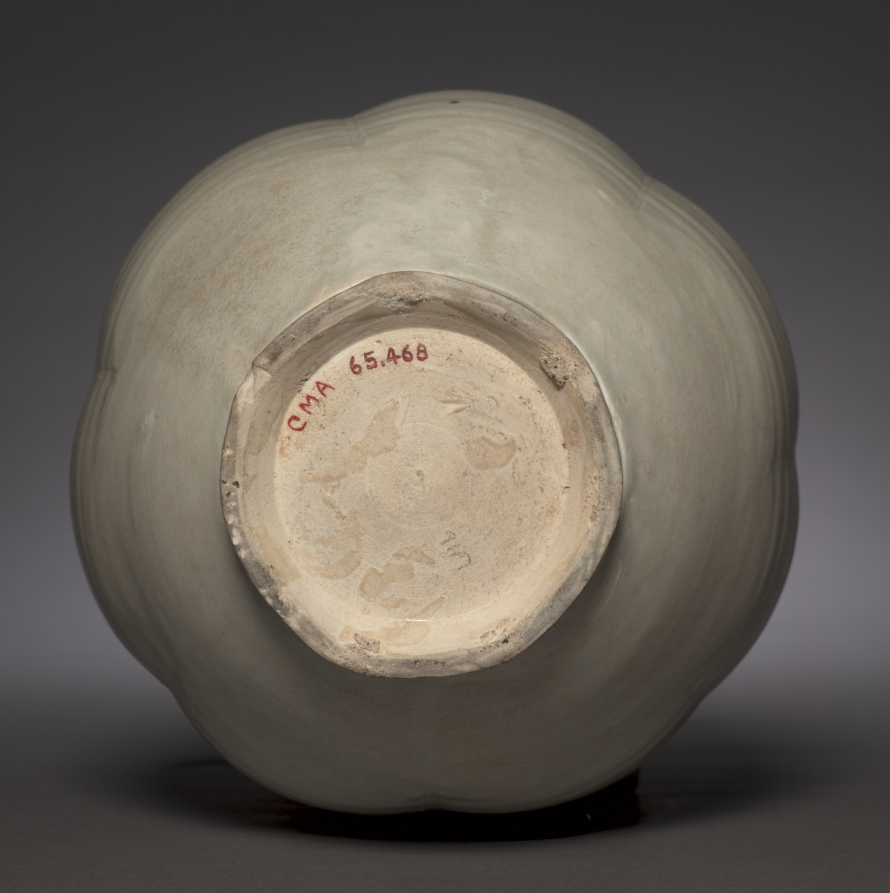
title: Phoenix-Headed Ewer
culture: China, possibly Guangdong Province, Xicun, Northern Song dynasty (960–1127)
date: 1000s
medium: porcelain with pale greenish-white glaze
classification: Ceramic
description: Phoenix-headed ewers of this type have been unearthed at Xicun in Guangdong province. Wares with a thick and coarse body were fired in local Xicun kilns, but those with a thin and refined body—such as this piece—were likely produced at Jingdezhen in Jiangxi province.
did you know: The phoenix's beak forms a spout for pouring.